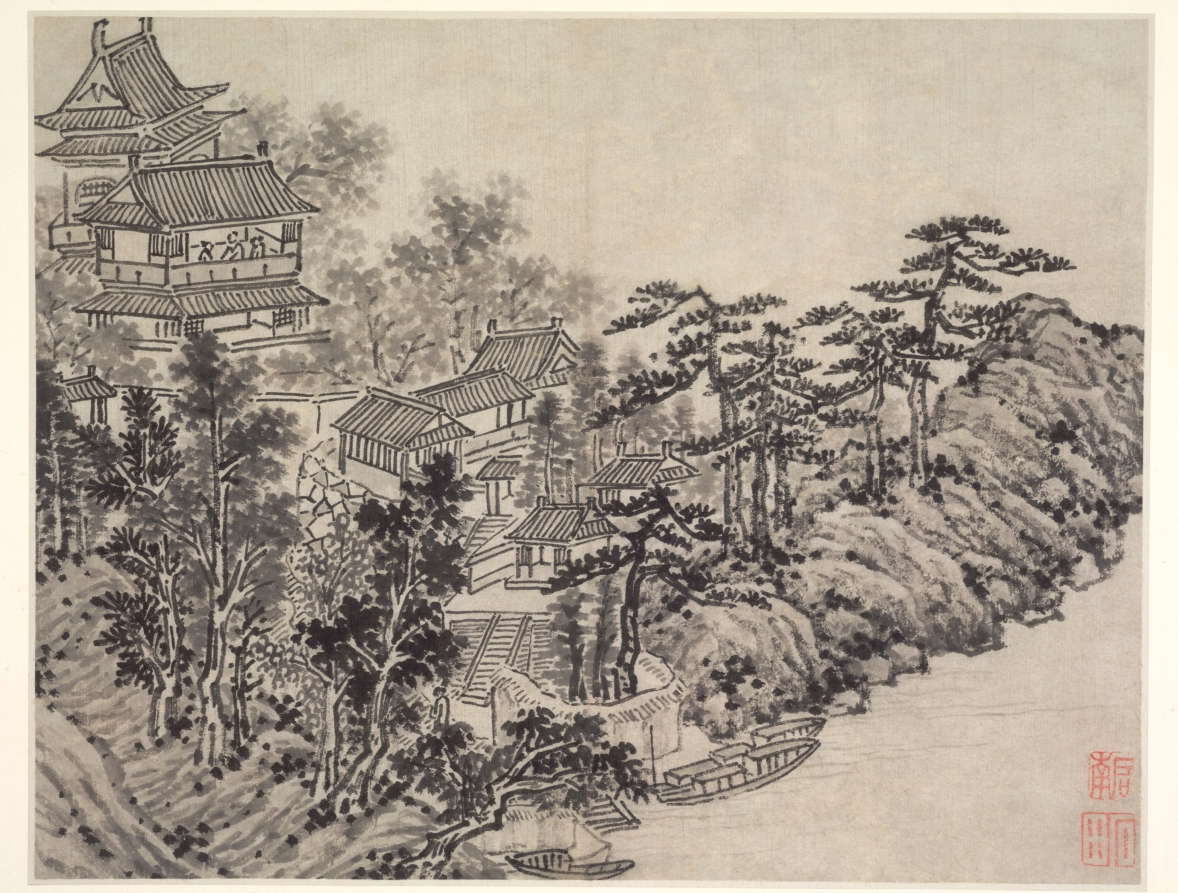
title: Cloud-Climbing Pavilion, from Twelve Views of Tiger Hill, Suzhou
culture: China, Ming dynasty (1368–1644)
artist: Shen Zhou (Chinese, 1427–1509)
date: after 1490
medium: Album leaf; ink on paper or ink and slight color on paper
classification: Painting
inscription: [印] 启南; 石田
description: Views of Tiger Hill depicts a historic site a few miles northwest of Suzhou. The scenes simulate a visit from arriving by boat at the foot of the mountain to climbing to Cloudy Cliff Monastery. Representations of the artist’s mature style, Shen Zhou included views in subtle colors in the suite of monochrome scenes. A Suzhou native, Shen Zhou was supported by family wealth and rejected an official career in favor of life as a retired scholar. Turning to painting in midlife, he is regarded as the founder of the Wu School of painting, with its center in Suzhou.